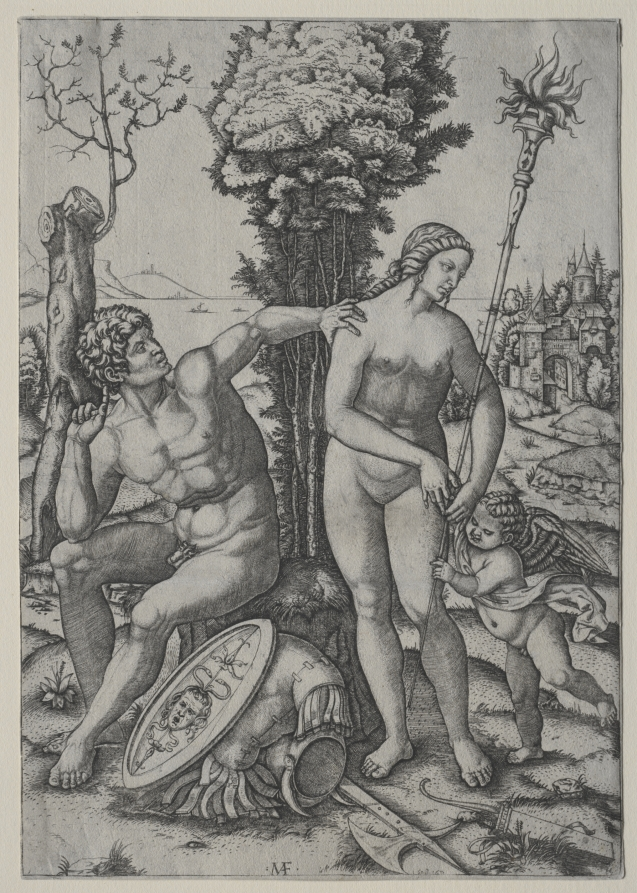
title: Venus, Mars and Cupid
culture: Italy, 16th century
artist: Marcantonio Raimondi (Italian, 1470/82–1527/34)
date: 1508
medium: engraving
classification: Print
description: Raimondi’s fascination with ancient marbles is evident in this allegory of love triumphant over war. He used the Belvedere Torso, a fragment of an ancient marble statue, as his model for the figure of Mars. The dynamic, twisting musculature of the broken sculpture inspired many artists who studied its form and incorporated it into new compositions. Here Mars sits disarmed while Venus and Cupid carry a torch of victory, their carefully modeled, static poses reminiscent of sculptures.